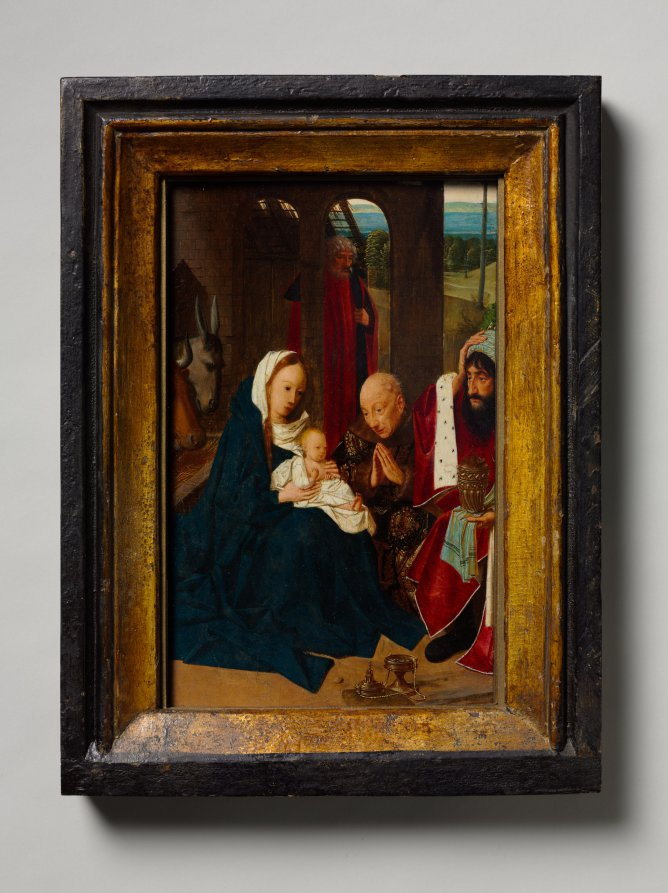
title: The Adoration of the Magi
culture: Netherlands, Haarlem, 15th century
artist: Geertgen tot Sint Jans (Netherlandish, c. 1460-c. 1490)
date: 1480s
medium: oil on wood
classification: Painting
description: Little is known about the life and career of Sint Jans. He seems to have been born in Haarlem in Holland in the northern Low Countries where he may have been attached to the Knights of Saint John as a lay brother, and likely produced an altarpiece for that order. (His name seems to derive from his affiliation with the Knights of Saint John.) He died young in his late 20s. Between 12 and 16 paintings are attributed to him. The subjects tend to derive from the New Testament. The original context of this painting is not known.